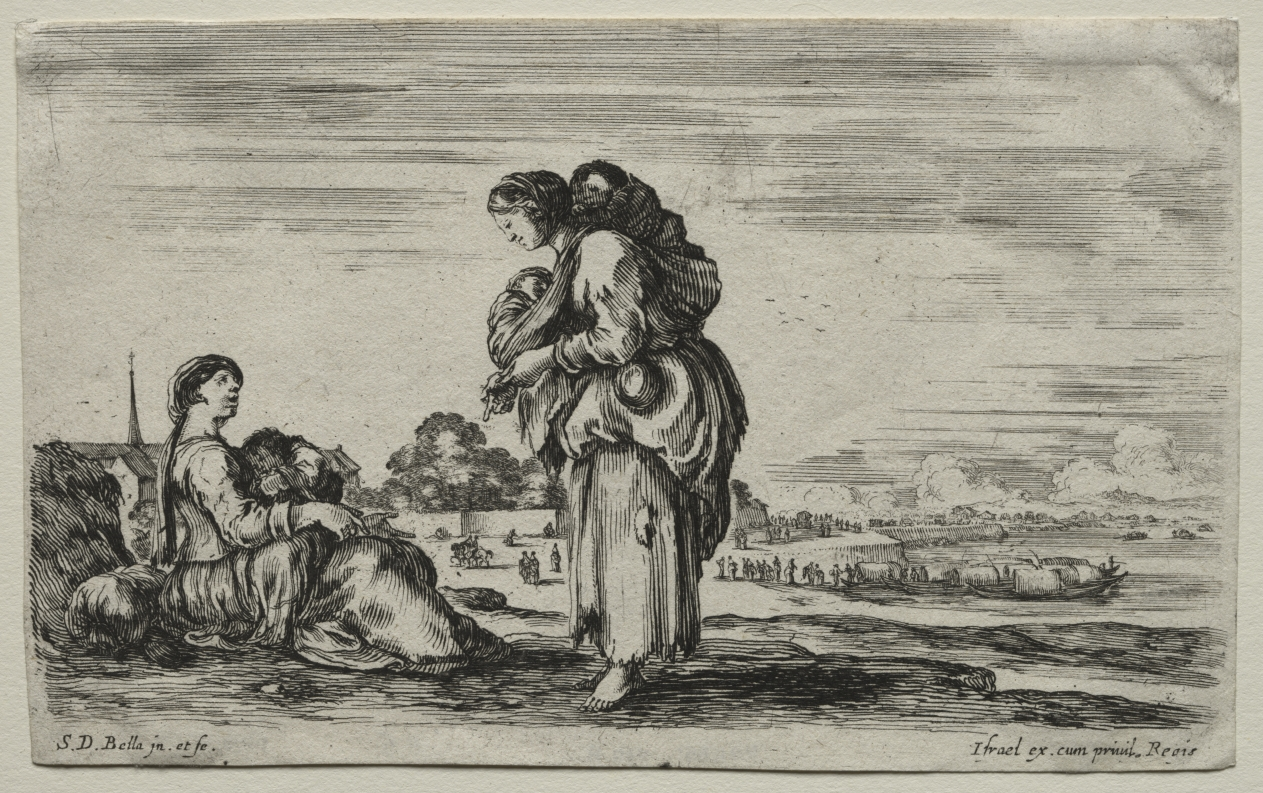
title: Various Figures and Landscapes: Two Mothers Chatting Together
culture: Italy, 17th century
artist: Stefano Della Bella (Italian, 1610–1664)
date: 1649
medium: etching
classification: Print